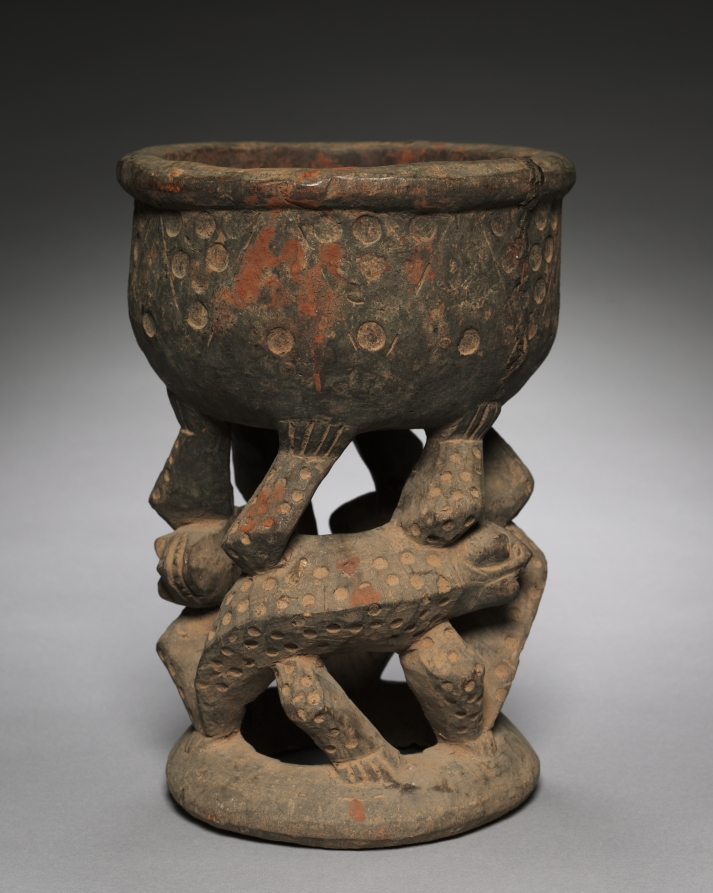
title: Stand or Bowl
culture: Africa, Central Africa, Cameroon, unknown maker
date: early 1900s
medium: Wood and organic materials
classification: Sculpture